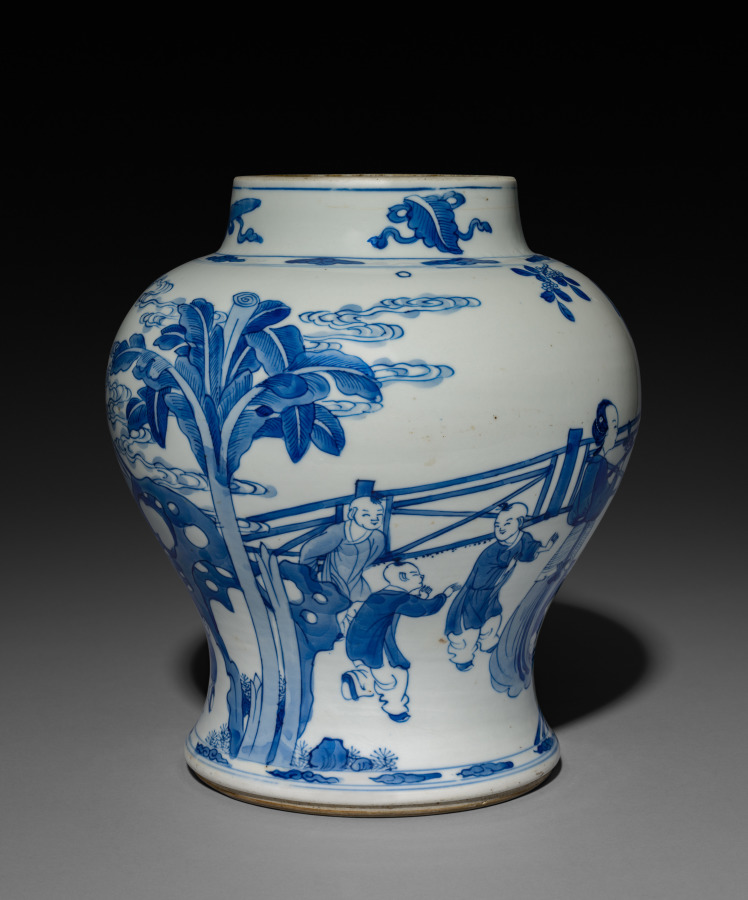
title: Vase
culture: China, Qing dynasty (1644–1911), Qianlong reign (1736–95)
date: 1736–95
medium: porcelain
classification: Ceramic